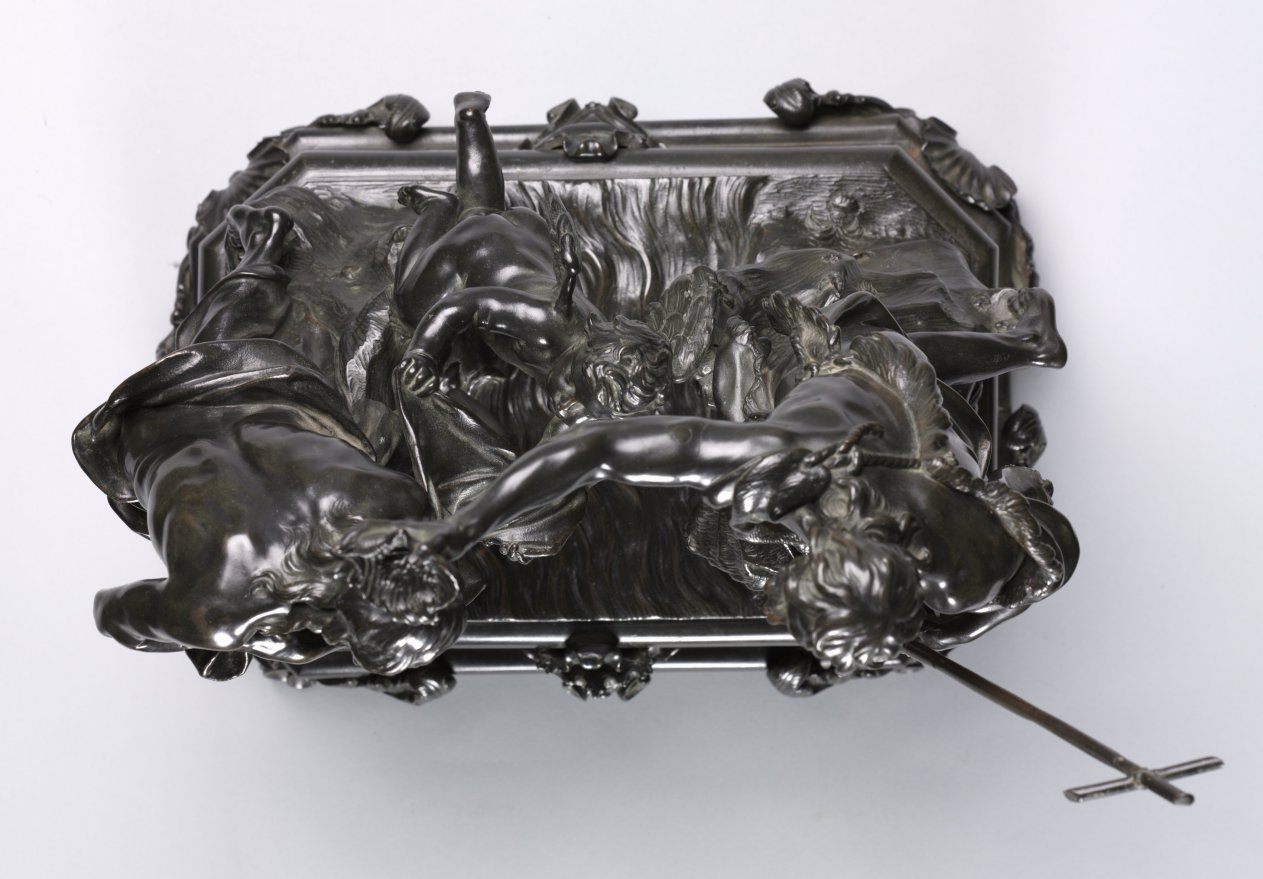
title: Baptism of Christ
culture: Italy, 17th century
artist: Alessandro Algardi (Italian, 1598–1654)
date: designed 1645–46, probably made 1650–55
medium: bronze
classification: Sculpture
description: When Innocent X (Giovanni Battista Pamphili, ruled 1644–55) became pope, Alessandro Algardi endeavored to obtain his patronage. This bronze Baptism of Christ is a casting from the molds used for an original silver sculpture that Algardi presented to the new pope to gain his support in 1646. The composition depicts an important scene in the life of Christ. On the right is John the Baptist, who pours water onto Jesus's head from a shell. As Christ bows his head to be baptized, a little angel holds the edge of his cloak. Algardi worked carefully to make this piece exciting from a number of points of view. Its dramatic emphasis shifts, depending on the viewer's vantage point.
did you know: Algardi's sculpture plays on its intended recipient's given name: Giovanni Battista (John the Baptist).